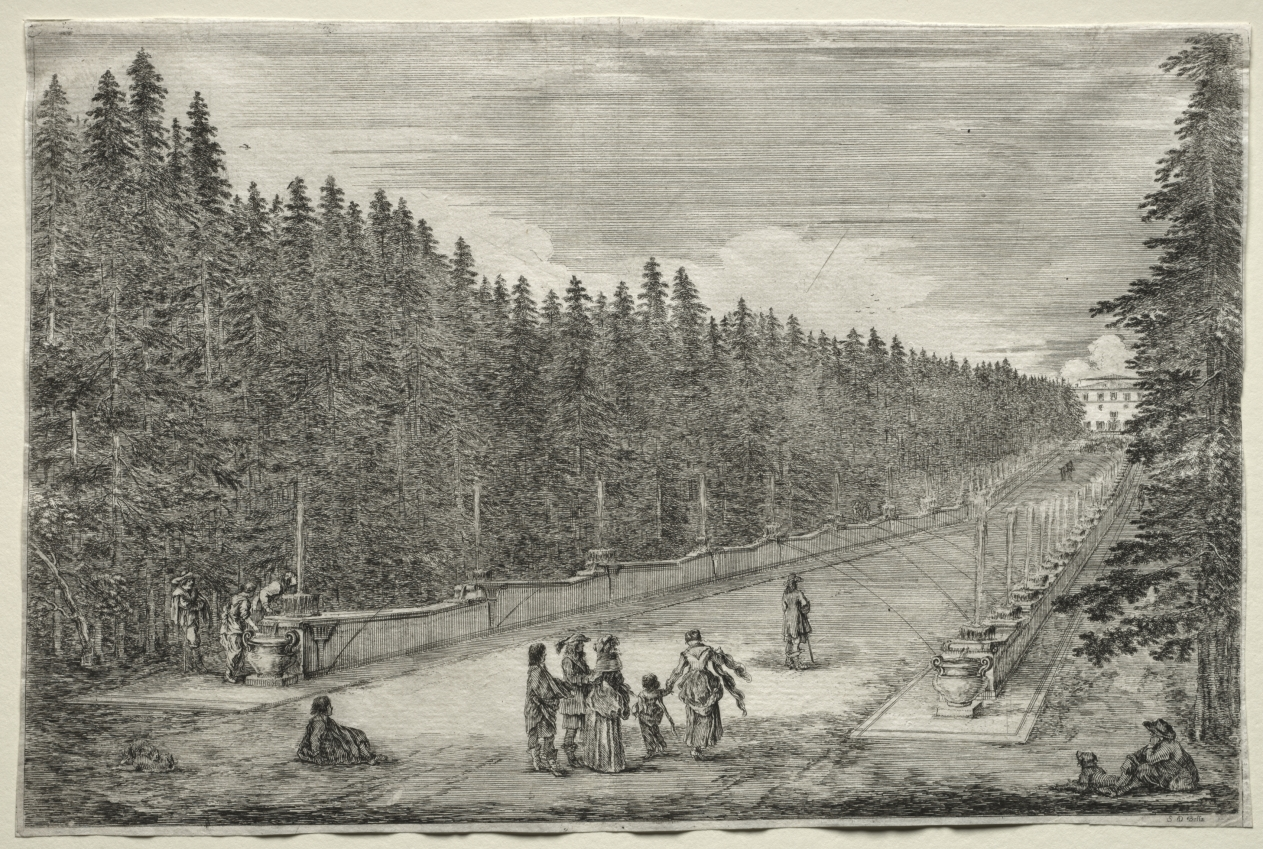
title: Views of the Villa of Pratolino: The Promenade of the Fountains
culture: Italy, 17th century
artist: Stefano Della Bella (Italian, 1610–1664)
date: c. 1653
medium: etching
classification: Print